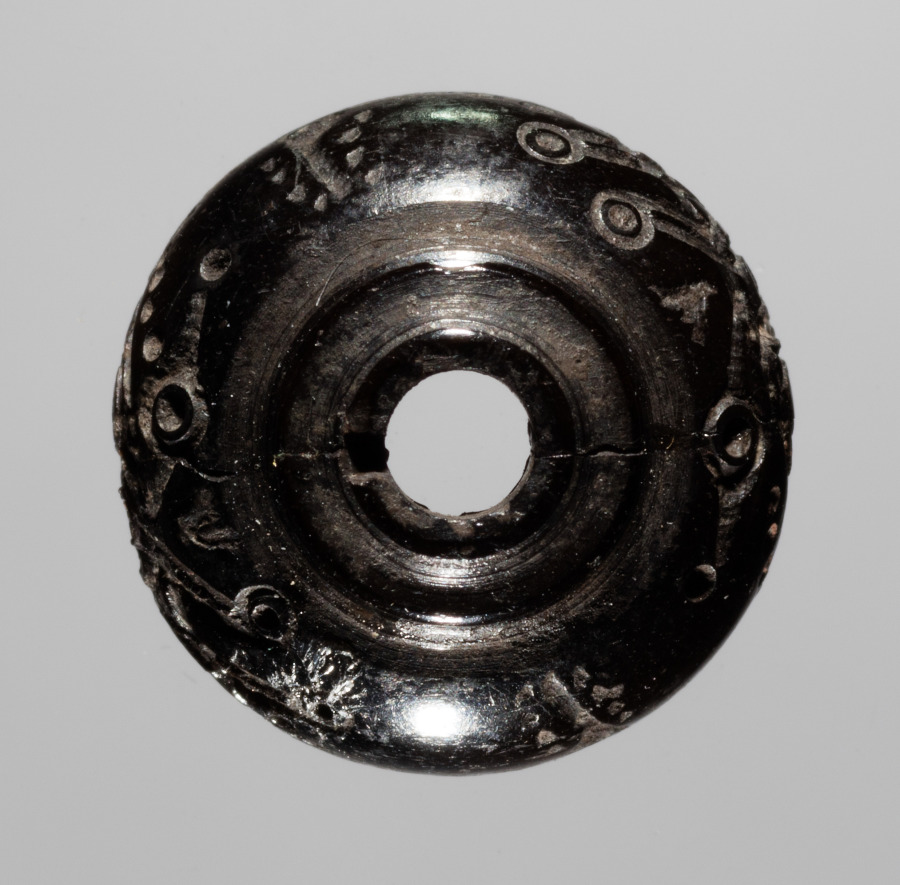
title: Spindle Whorl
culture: Iran, early Islamic period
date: 700s - 900s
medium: bone, incised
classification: Spindle Whorl